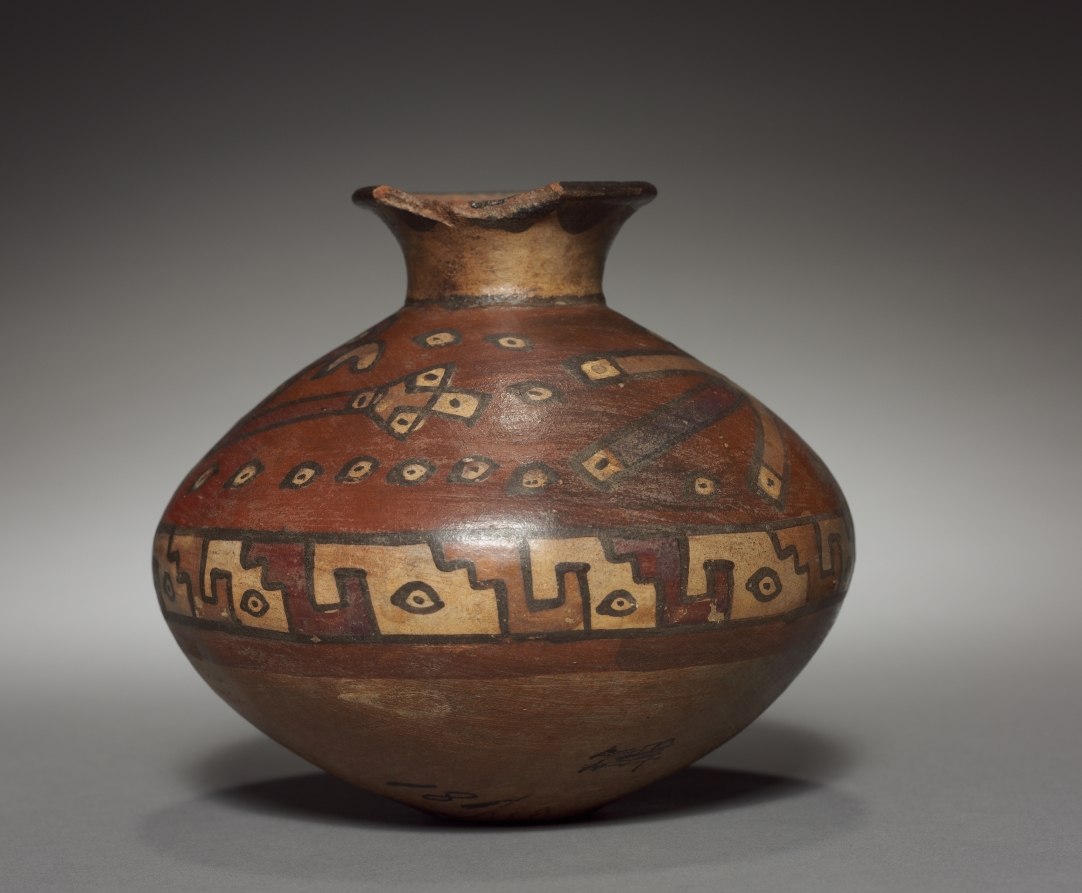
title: Vessel with Bird Designs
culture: Peru, South Coast, Middle Horizon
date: 700–1000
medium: pottery with burnished, colored slips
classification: Sculpture